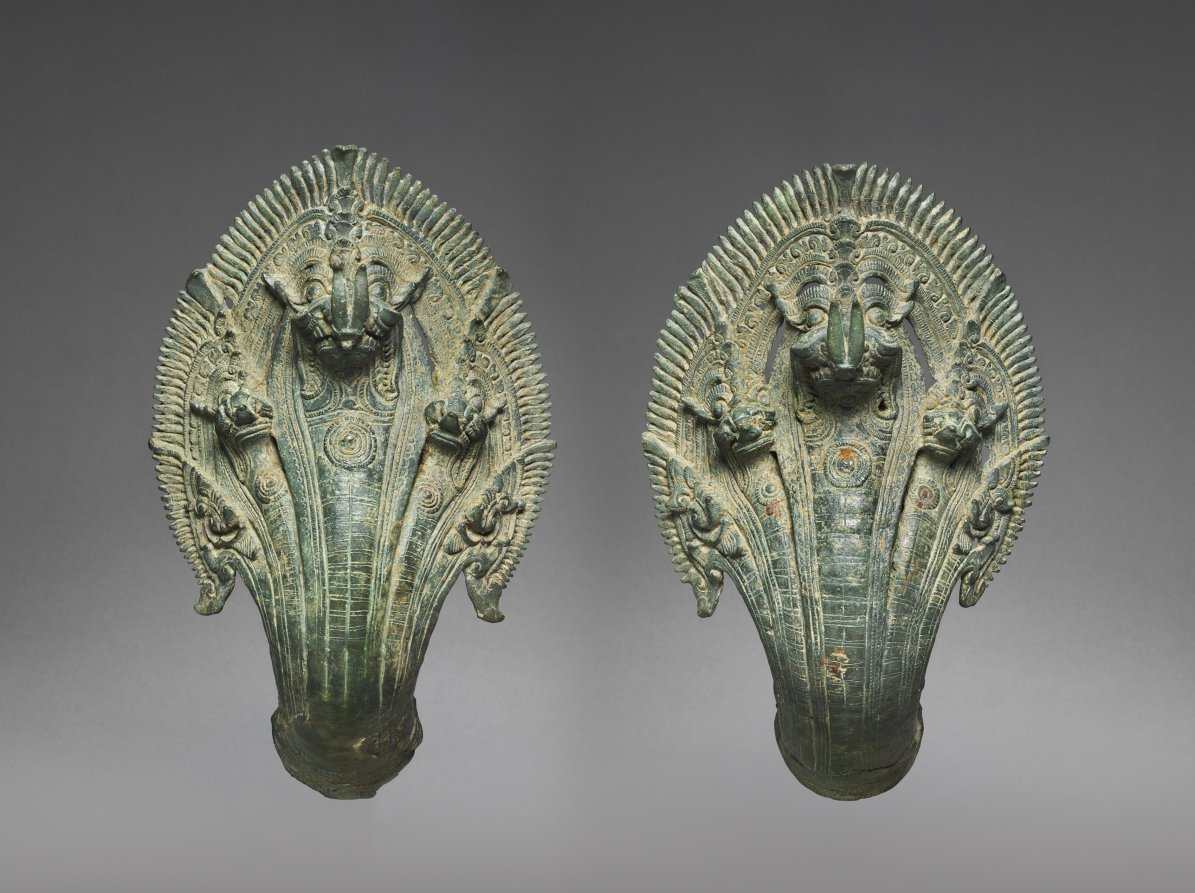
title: Pair of naga finials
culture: Cambodia, probably Angkor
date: 1100s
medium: bronze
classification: Metalwork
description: When members of the royal family or priesthood traveled in a public festival procession or to a temple to make offerings or participate in a ceremony, they would be carried in a palanquin, or a covered litter. Portable objects of veneration, such as bronze images or a sacred fire, were also carried on palanquins. The palanquins had wooden poles, hanging seats or raised platforms, and bronze fittings cast in intricate forms and gilt, lending the palanquins a sumptuous quality. The royal palanquins were typically fitted with multiheaded, serpent-shaped finials at the ends of the poles and corners of the elevated platforms. Naga means serpent in Sanskrit, a language from India selectively appropriated by the Khmer in Cambodia. In their own indigenous mythology, the Khmer people trace their descent from a naga princess and a prince from the island of Java who journeyed to Cambodia. The naga remains a potent emblem for the Khmer nation to this day; it is ubiquitous on Cambodian monuments.